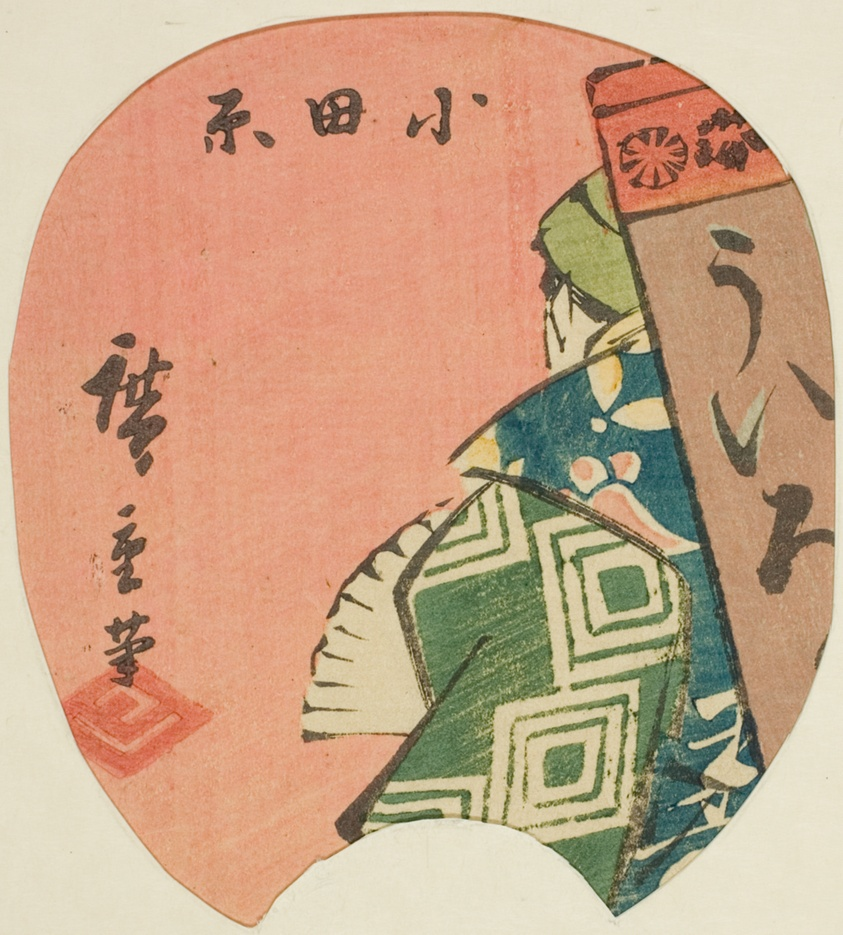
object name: Print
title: Odawara, section of sheet no. 3 from the series "Cutout Pictures of the Tokaido (Tokaido harimaze zue)"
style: Japanese (culture or style)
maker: Utagawa Hiroshige 歌川 広重; Japanese, 1797-1858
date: c. 1848/52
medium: Color woodblock print; section of harimaze sheet (uncut sheet: 1939.1291)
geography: Japan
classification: woodblock print; print; asian art